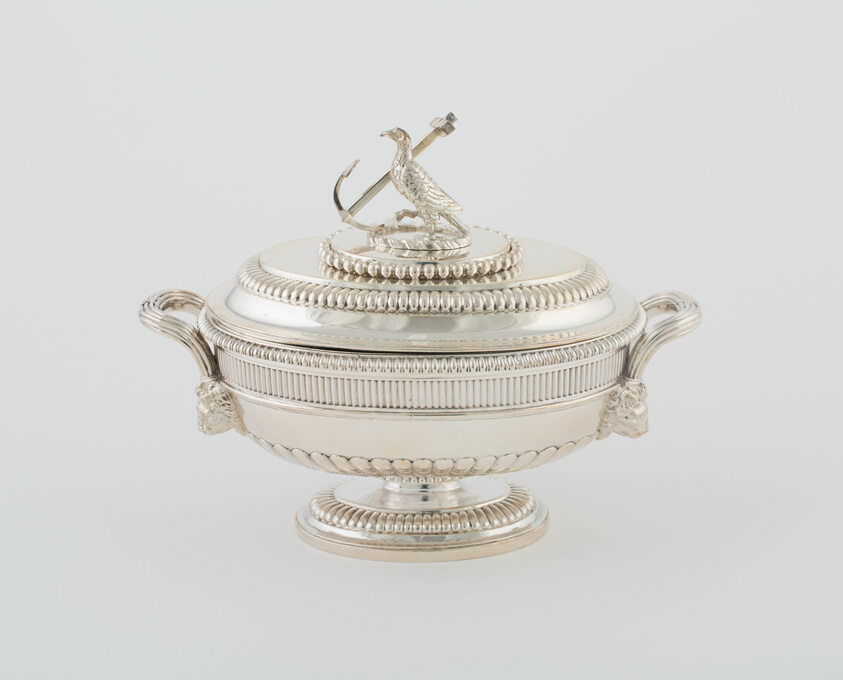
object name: Metalwork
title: Sauce Tureen and Cover from the Hood Service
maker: Paul Storr; English, 1771-1844; London, England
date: 1807/08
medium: Sterling silver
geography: England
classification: silver; metalwork; european decorative arts